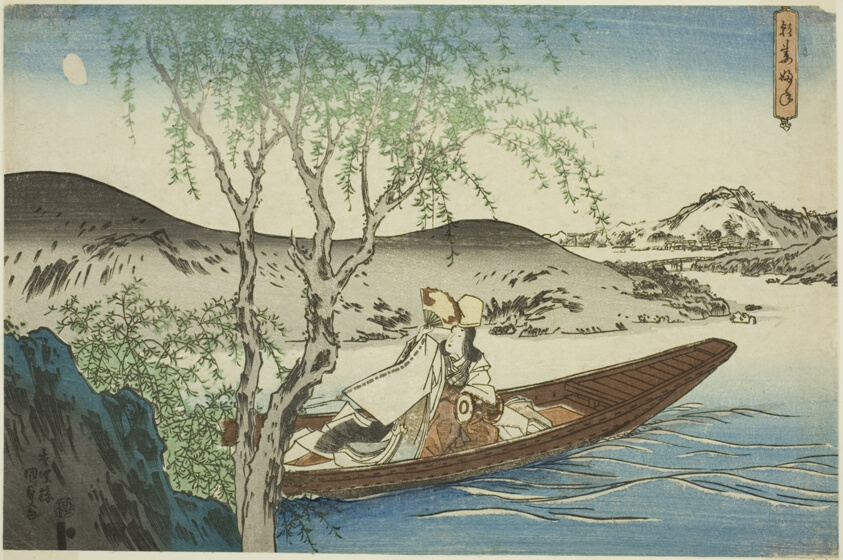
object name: Print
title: Shirabyoshi Dancer in Asazuma Boat (Asazuma-bune), from an untitled series of landscapes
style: Japanese (culture or style)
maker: Utagawa Kunisada I (Toyokuni III) (Japanese, 1786-1864)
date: c. 1830/34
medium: Color woodblock print; oban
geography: Japan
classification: woodblock print; print; asian art